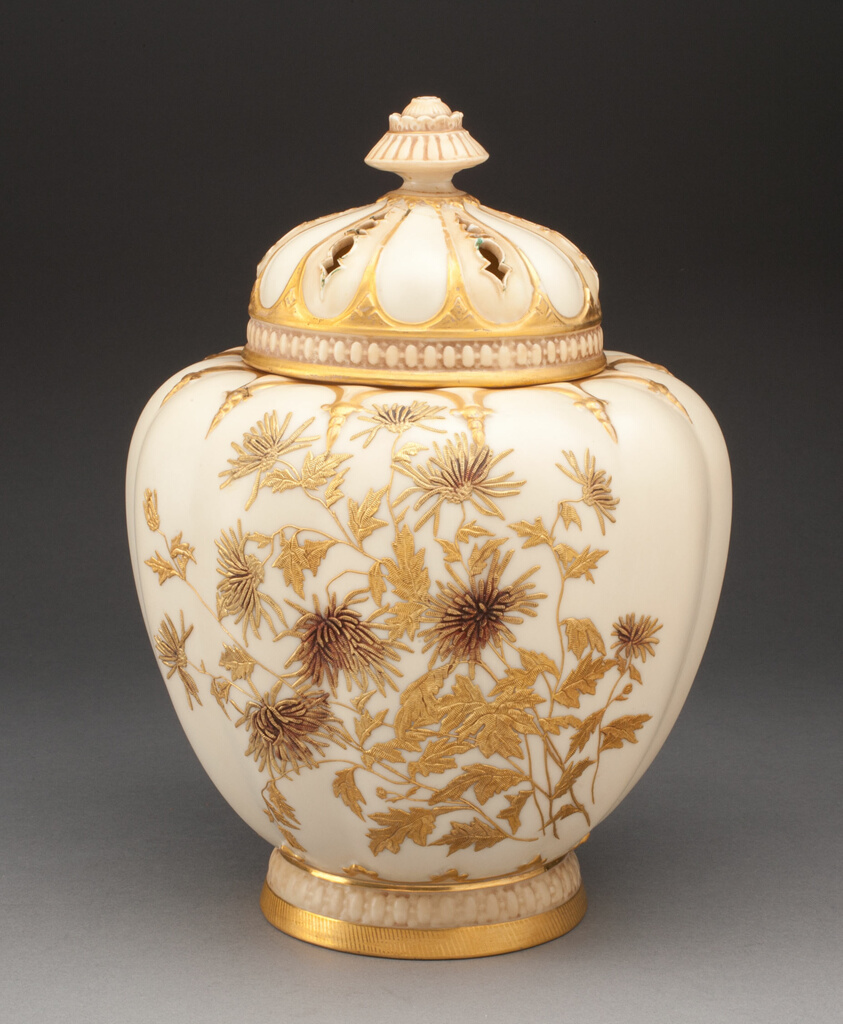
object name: Ceramics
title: Potpourri Vase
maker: Worcester Porcelain Factory (Worcester Royal Porcelain Company, 1862-1958); Worcester, England, founded 1751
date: c. 1885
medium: Soft-paste porcelain and gilding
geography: Worcester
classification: vase; vessel; porcelain; ceramics; european decorative arts